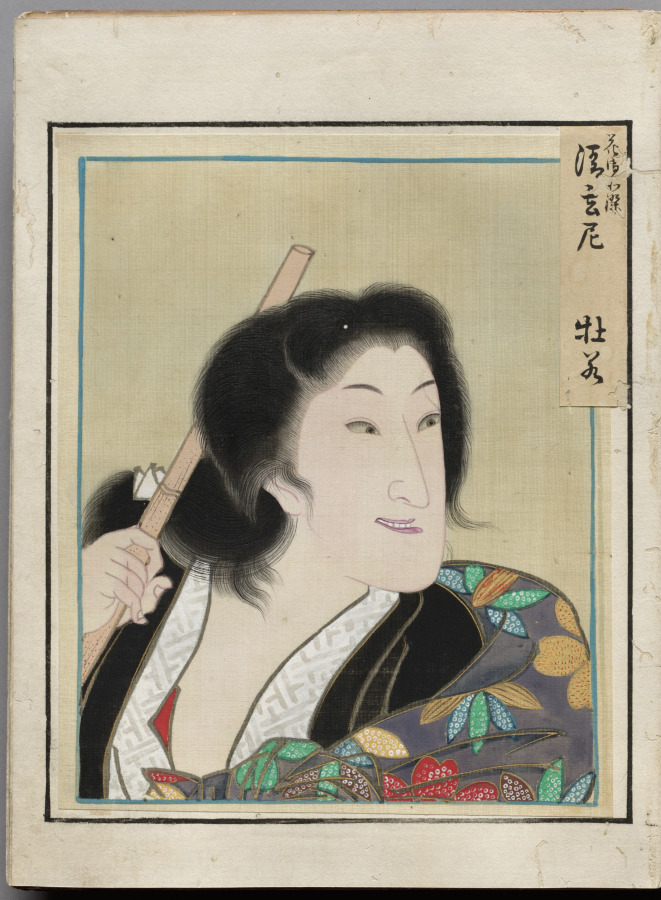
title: Double-Leaf from Album of Actor Portraits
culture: Japan, Edo period (1615–1868)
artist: Shōrakusai (Japanese)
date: c. 1790–1810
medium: double-leaf from an accordion-style album; ink on paper (right), and ink and color on silk (left)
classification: Bound Volume